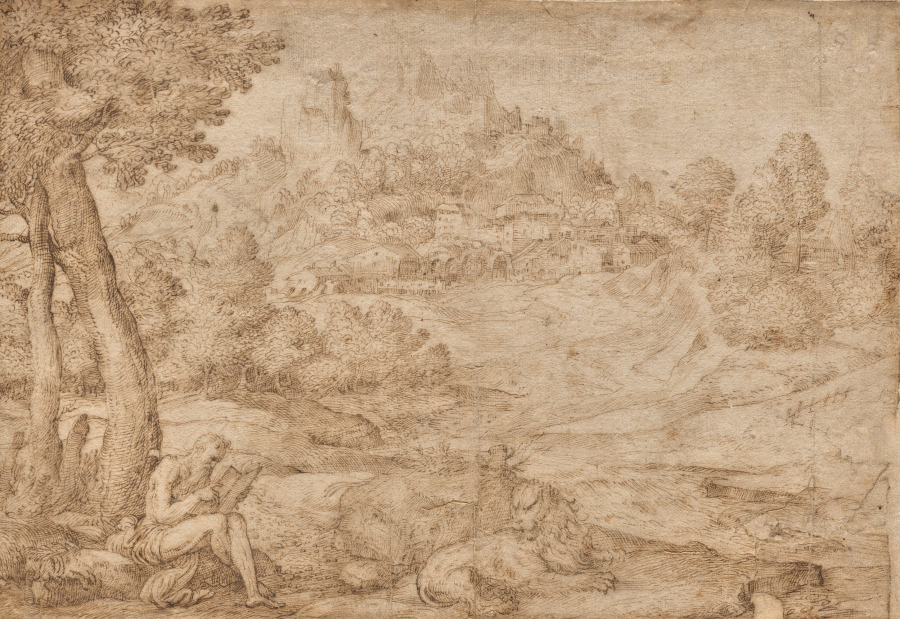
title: Saint Jerome in a Landscape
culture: Italy, 16th century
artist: Domenico Campagnola (Italian, 1500–1564)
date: c. 1530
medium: pen and brown ink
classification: Drawing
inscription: RECTO OF MOUNT, lower left, in graphite: 61 [6 crossed out, 1 underlined] / 236 [underlined] ; lower center, in graphite: Titian [inscribed in a cartouche] ; lower center, in graphite: 3 ; lower right, in graphite: 8930 [erased] ; lower right, in graphite: [illegible]/q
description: Domenico Campagnola helped to establish a specialized collector’s market for landscape drawings, building upon the legacy of his father, Giulio Campagnola, and Titian. Like Titian, Domenico’s works emphasize God’s power as expressed through the natural world. Hermit Saint Jerome, at lower left, sits in spiritual contemplation within a dynamic landscape rendered with Domenico’s distinctive linear style, complete with rustic houses, humble tree groves, and grand distant vistas. Independent drawings (drawings made as works of art in and of themselves) were a new category of drawing advanced by Domenico and others.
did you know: Domenico Campagnola was one of the first artists in Renaissance Italy to create drawings such as this as ends in themselves rather than as preparatory studies.